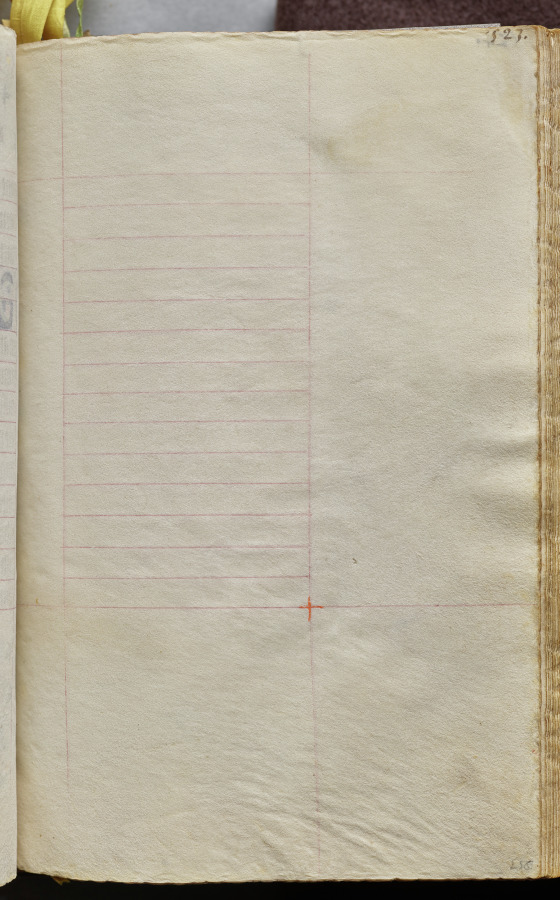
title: Hours of Charles the Noble, King of Navarre (1361-1425): fol. 256r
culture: France, Paris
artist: Master of the Brussels Initials and Associates (French)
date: c. 1405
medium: ink, tempera, and gold on vellum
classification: Bound Volume